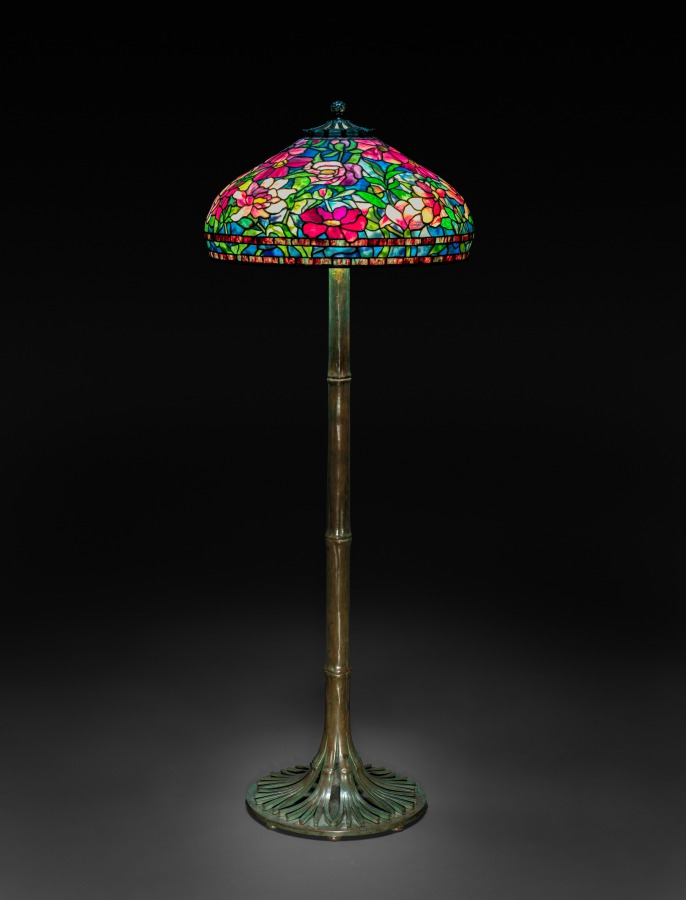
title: Peony Floor Lamp with a Bamboo Base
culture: America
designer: probably by Clara Wolcott Driscoll (American, 1861–1944)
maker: Tiffany Studios (United States, New York, 1902–32)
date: c. 1905–10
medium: Leaded glass, bronze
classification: Furniture and woodwork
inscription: TIFFANY STUDIOS NEW YORK 505-17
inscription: TIFFANY STUDIOS/NEW YORK/10933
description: Tiffany and his designers brought the garden inside with their floral lamp designs. They also re-created the ever-changing qualities of natural light using the light and dark tonal effects of the glass when illuminated with electric lamps. This night and day version of the Peony shade could be rotated during the day to increase or decrease the amount of light it cast—intense reds for a darker glow at night, lighter pinks during the day.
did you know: The shade on this floor lamp can be rotated with the touch of a finger to provide brighter or dimmer light.